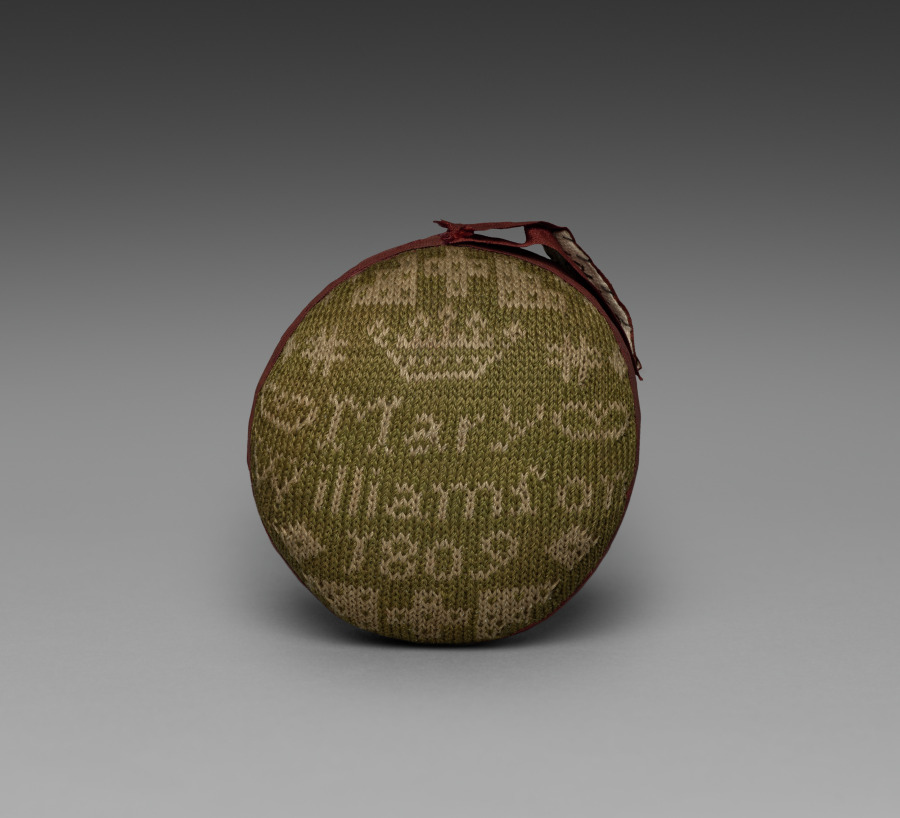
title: Pin Cushion Sampler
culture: England, 19th century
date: 1809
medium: Silk, knitted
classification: Sampler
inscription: "MARY WILLIAMSON 1809."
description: There is an inscription knit into this pin cushion, with the name Mary Williamson and the date 1809.